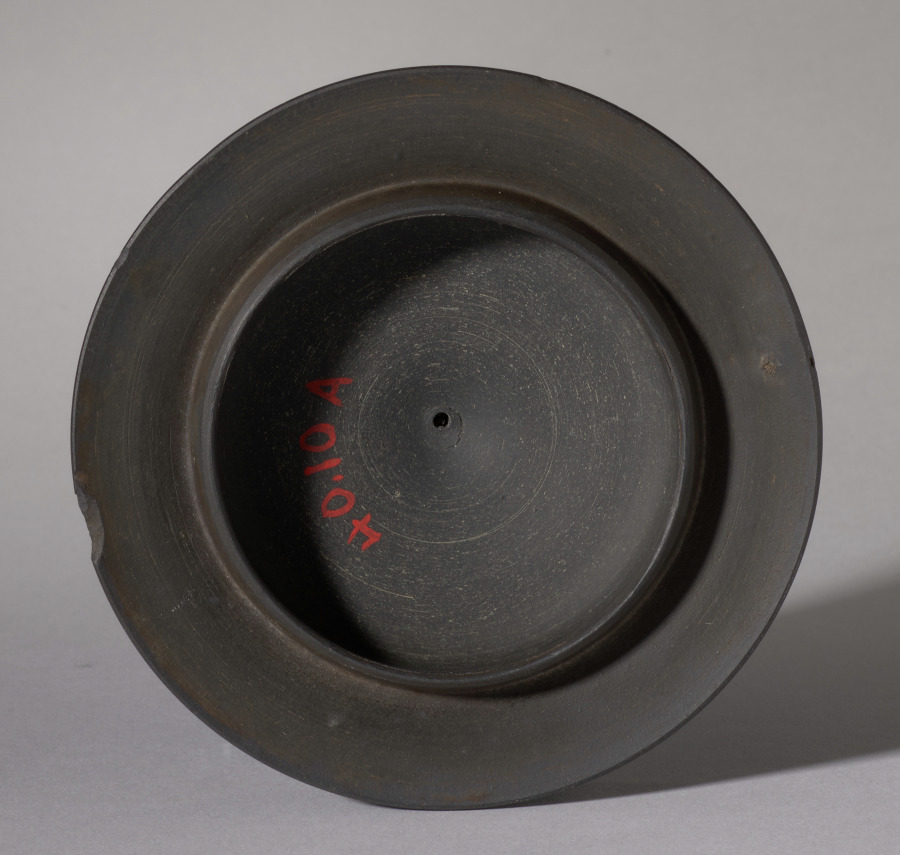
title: Teapot (lid)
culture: England, Staffordshire, 19th century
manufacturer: Davenport Pottery and Porcelain Factory (British)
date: 1800s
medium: black basalt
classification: Ceramic